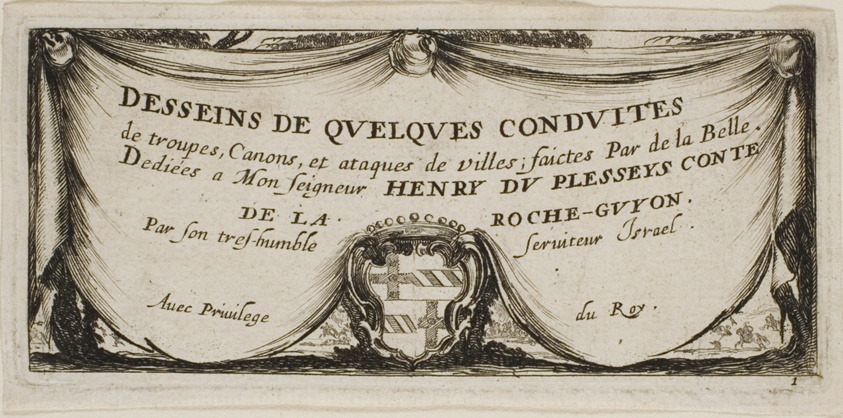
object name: Print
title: Frontispiece to Drawings of Several Movements by Soldiers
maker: Stefano della Bella (Italian, 1610-1664)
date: 1644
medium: Etching on ivory laid paper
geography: Italy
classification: etching; print; prints and drawing